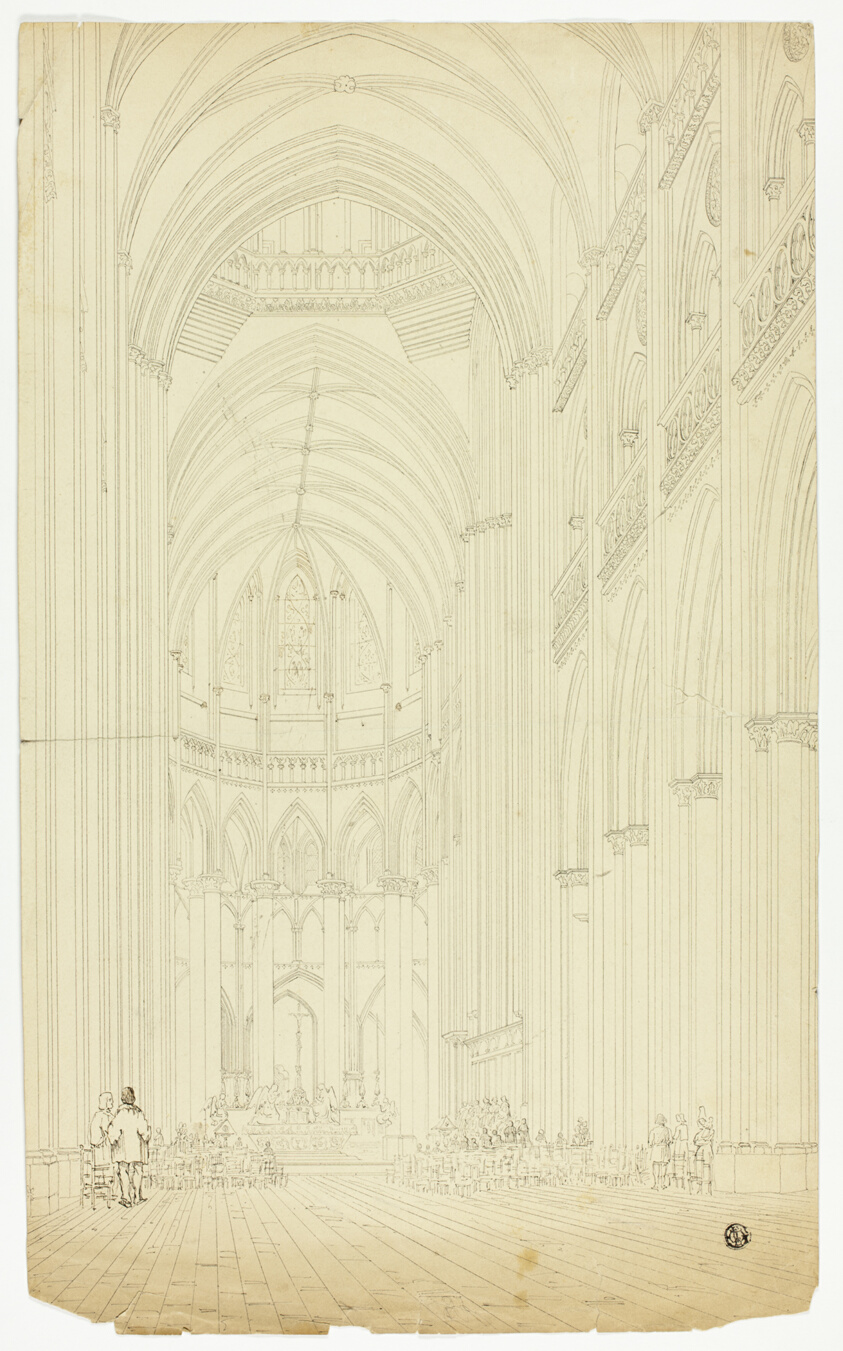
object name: Drawing and Watercolor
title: Interior of a Gothic Cathedral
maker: Unknown Artist; Flemish, 16th-18th centuries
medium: Pen and black ink, with touches of brown ink, on cream wove paper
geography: Flanders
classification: pen and ink drawings; paper; drawings (visual works); prints and drawing